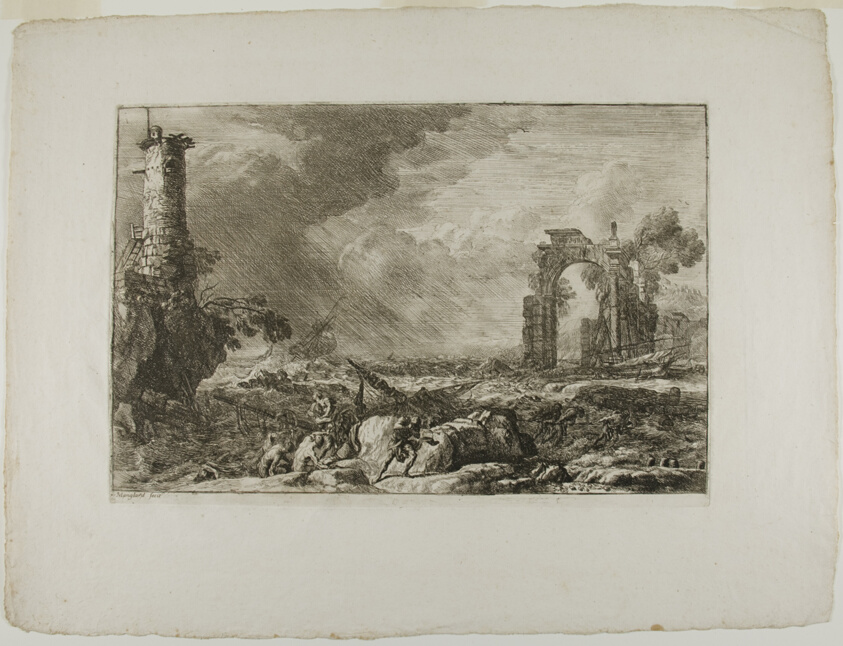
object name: Print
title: The Shipwreck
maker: Adrien Manglard (French, 1695-1760)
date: 1753–54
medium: Etching in black on ivory laid paper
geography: France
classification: etching; print; prints and drawing